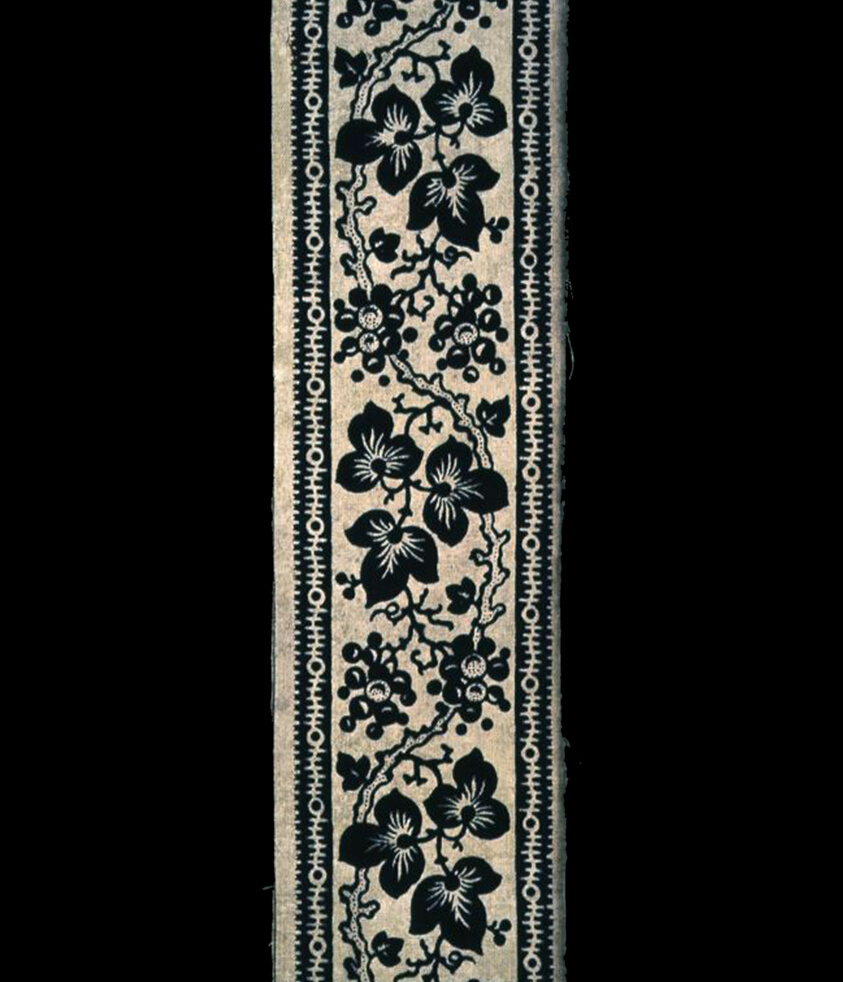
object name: Textile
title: Border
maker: England or United States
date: 19th century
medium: Cotton, plain weave; block printed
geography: England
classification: textile; weaving - printed